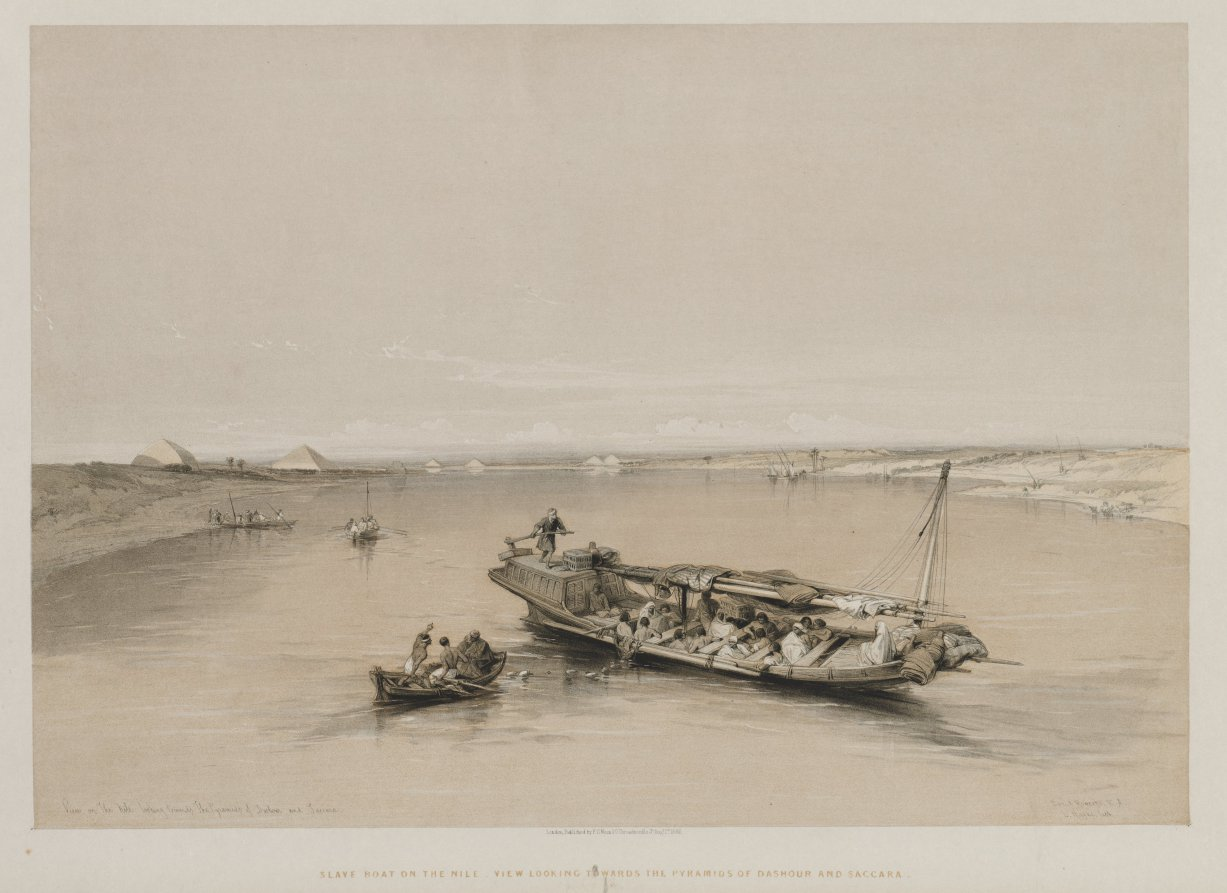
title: Egypt and Nubia, Volume I: View on the Nile Looking Towards the Pyramids of Dashour and Saccara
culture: England, 19th century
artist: Louis Haghe (British, 1806–1885)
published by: F. G. Moon, 20 Threadneedle Street, London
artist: after David Roberts (Scottish, 1796–1864)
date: 1846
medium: color lithograph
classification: Print